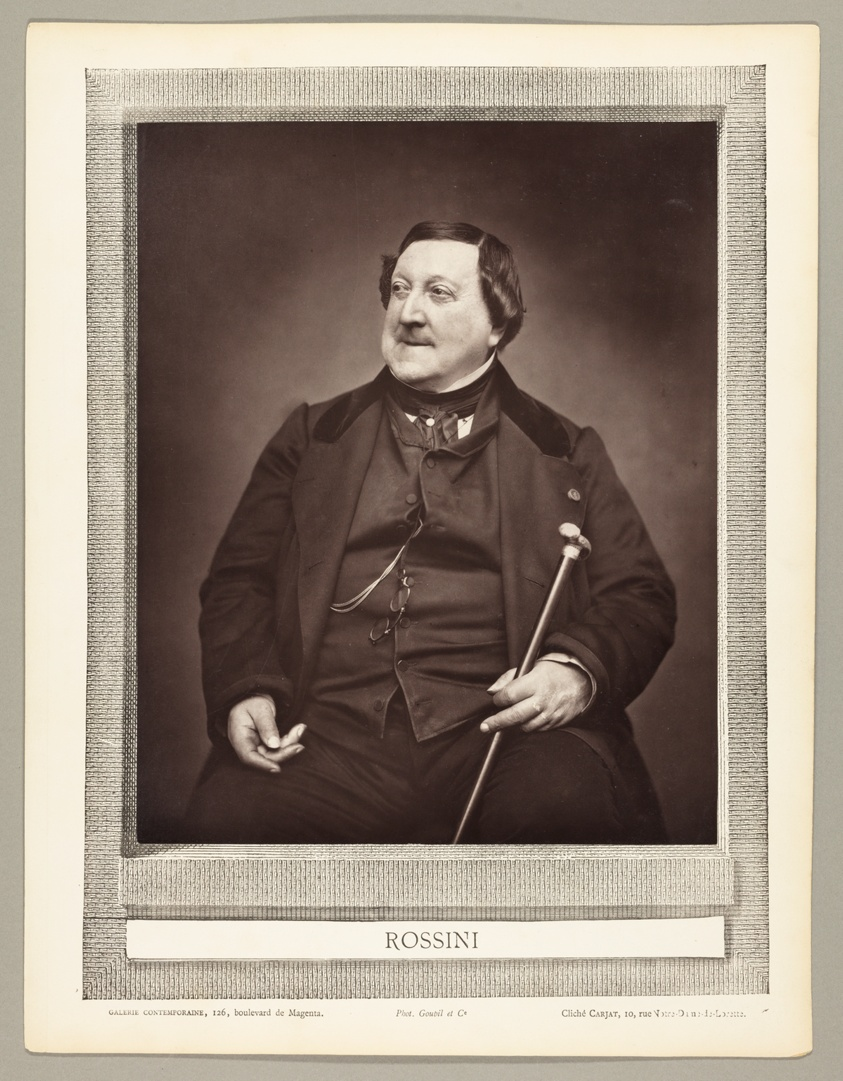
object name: Photograph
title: Gioachino Antonio Rossini (Italian composer, 1792-1868)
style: 19th century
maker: Étienne Carjat; French, 1828–1906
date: 1862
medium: Woodburytype, from the periodical “Galerie Contemporaine Littéraire, Artistique” (1876), volume 3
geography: France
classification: woodburytype; photomechanical process; photography; photograph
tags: Collected by Hugh Edwards, Paris, Contemporaine Littéraire